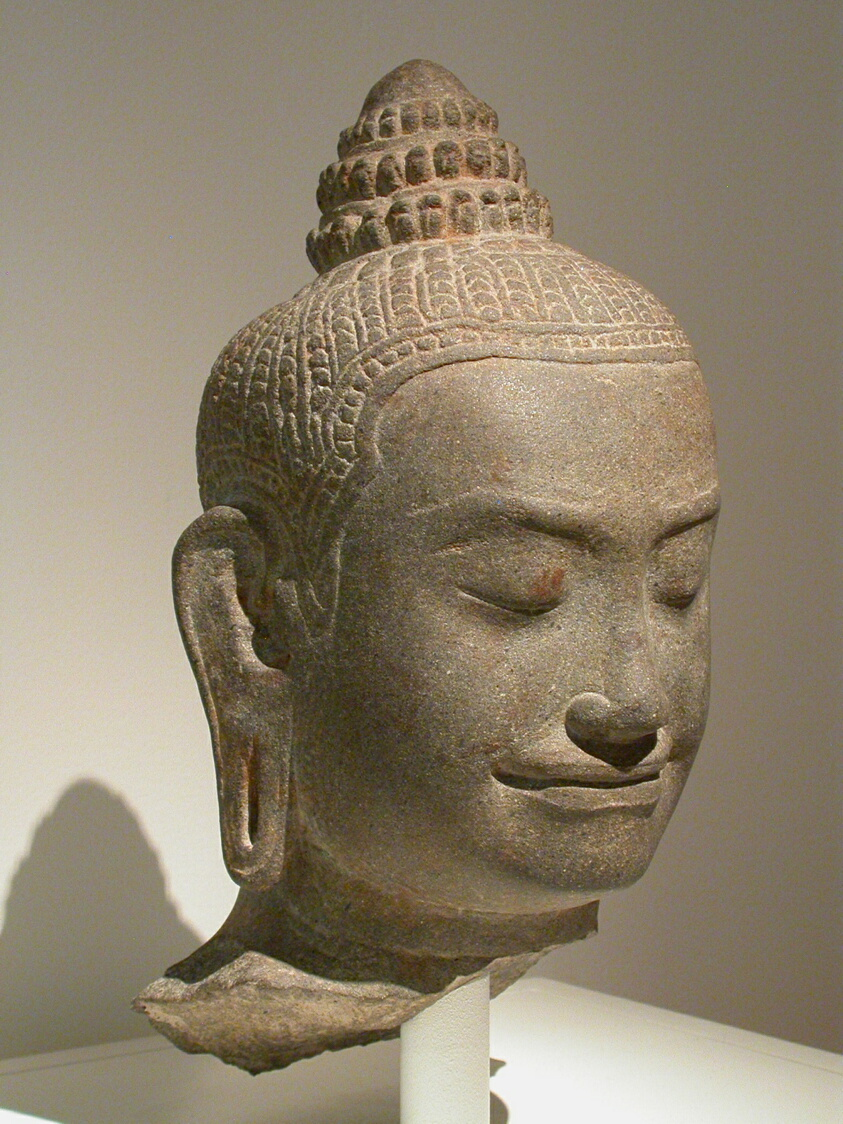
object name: Sculpture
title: Head of a Buddhist Deity, Possibly Prajnaparamita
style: Southeast Asian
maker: Cambodia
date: Angkor period, late 12th/early 13th century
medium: Sandstone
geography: Cambodia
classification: stone (unidentified); stone; sculpture; asian art